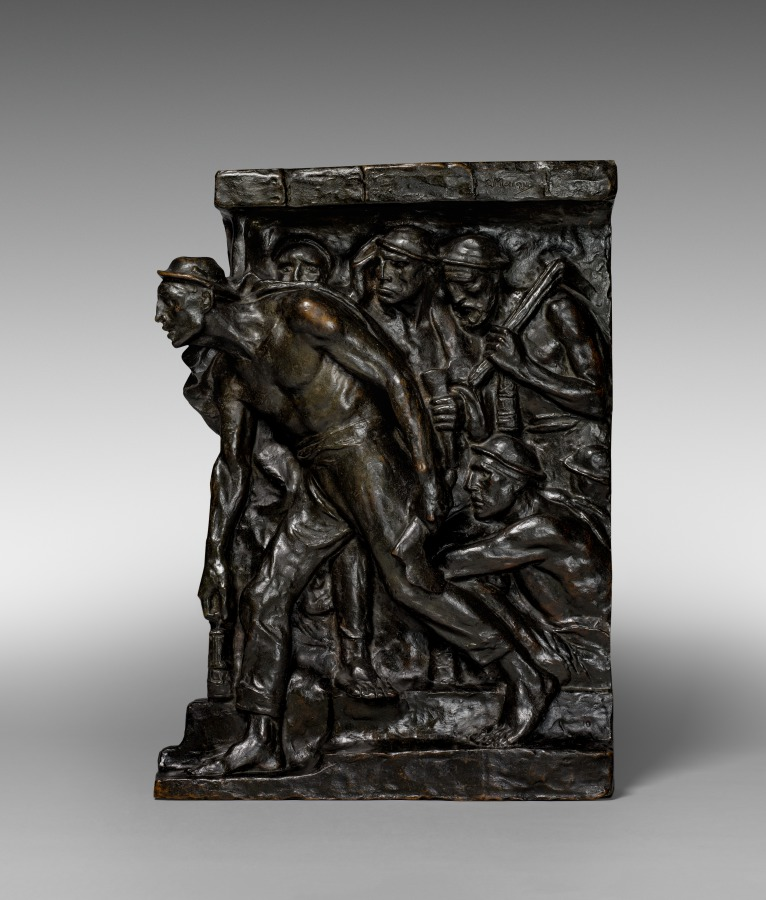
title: The Miners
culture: Belgium, 19th century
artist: Constantin Meunier (Belgian, 1831–1905)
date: c. 1890 – 1900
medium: bronze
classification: Sculpture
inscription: Signed on top: "C. Meunier"; inscribed on right side: "Atelier C. Meunier, 50 Rue (?)"